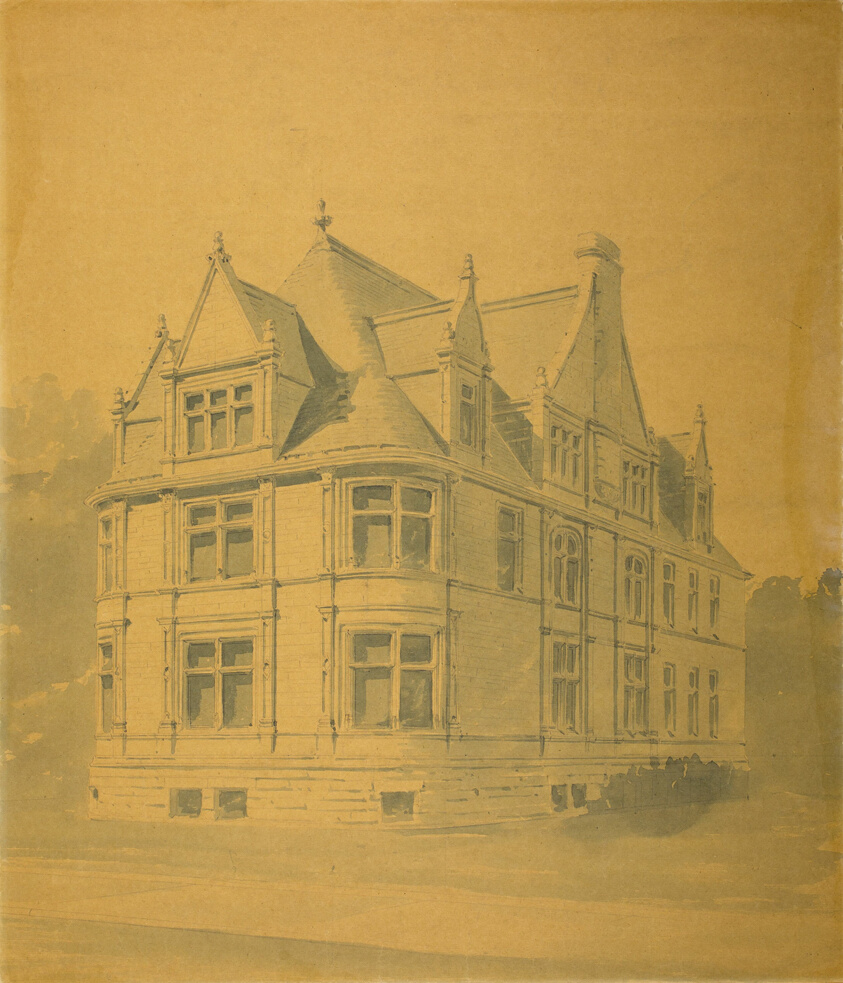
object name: Architectural Drawing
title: William J. Goudy House, Chicago, Illinois, Perspective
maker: Burnham and Root (American, 1873-1891); John Wellborn Root (American, 1850-1891)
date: c. 1889/90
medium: Graphite and wash on manila paper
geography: United States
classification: presentation drawing; architectural drawing; architecture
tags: Chicago